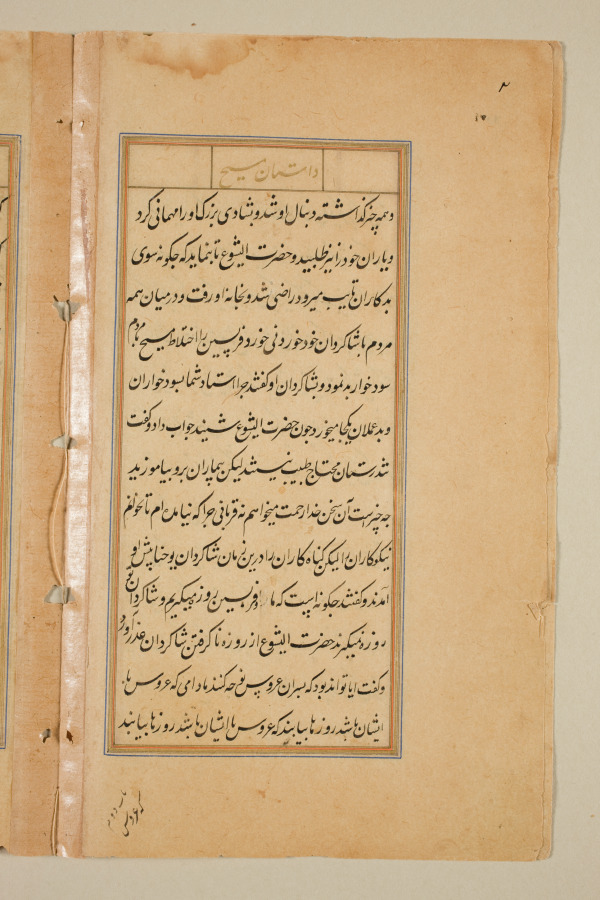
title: Text page from a Mirror of Holiness (Mir’at al-quds) of Father Jerome Xavier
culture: Mughal India, Allahabad, made for Prince Salim (1569–1627)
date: 1602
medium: Ink and gold on paper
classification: Manuscript